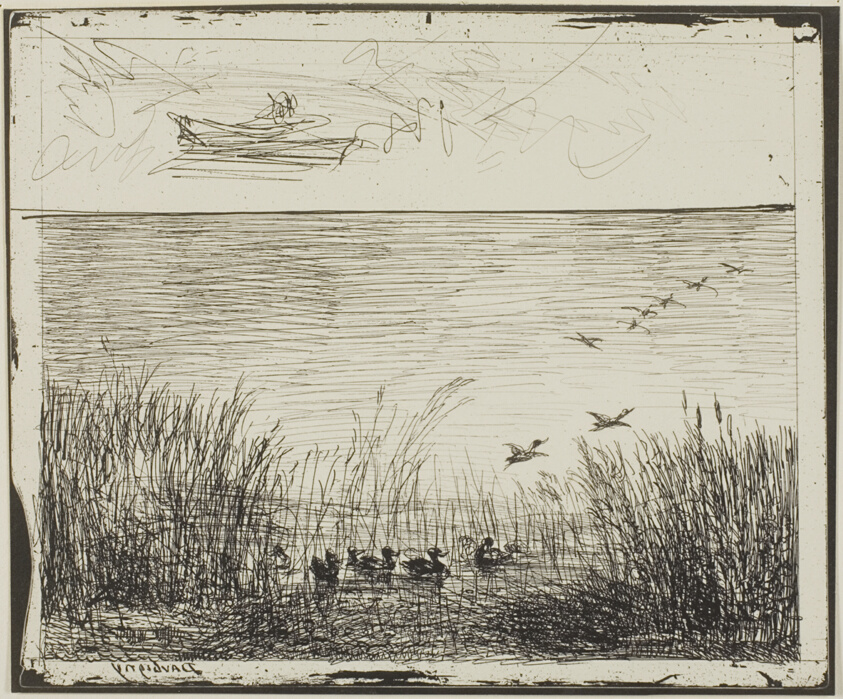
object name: Print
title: Marsh with Ducks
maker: Charles François Daubigny (French, 1817-1878)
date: 1862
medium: Cliché-verre on ivory photographic paper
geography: France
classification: cliché-verre; print; prints and drawing